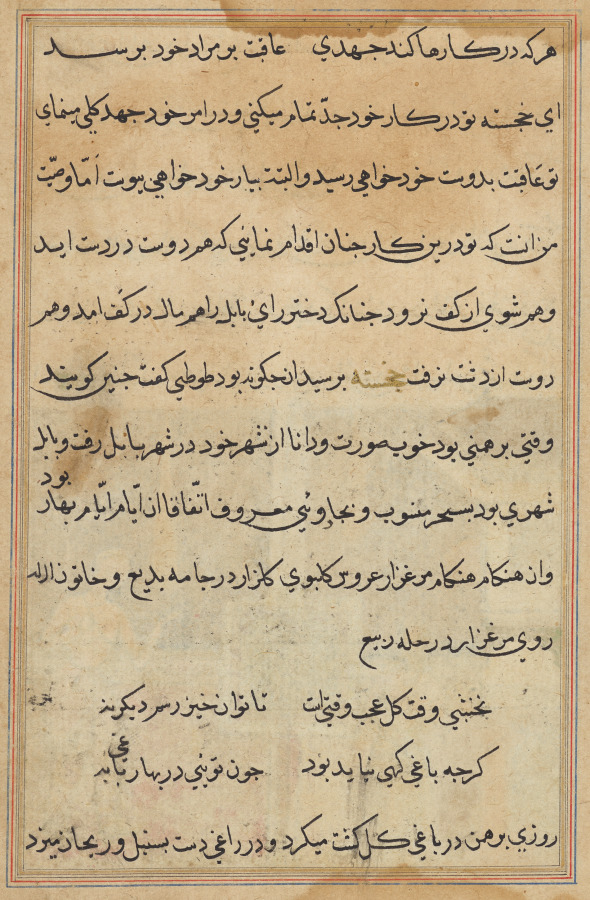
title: Page from Tales of a Parrot (Tuti-nama): text page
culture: Mughal India, court of Akbar (reigned 1556–1605)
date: c. 1560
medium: gum tempera, ink, and gold on paper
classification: Painting